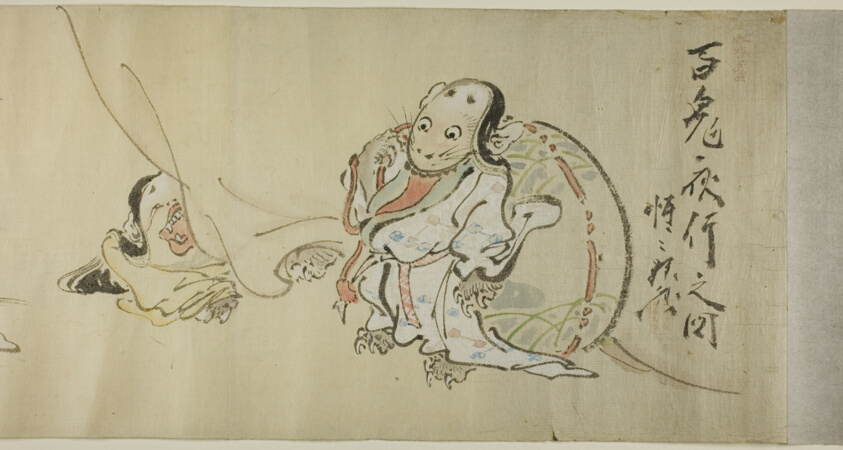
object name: Painting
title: Night Procession of Goblins (Hyakki yagyo no zu)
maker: Kawanabe Kyosai; Japanese, 1831-1889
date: c.1865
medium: Handscroll; Ink and colors on paper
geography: Japan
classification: handscroll; painting; asian art